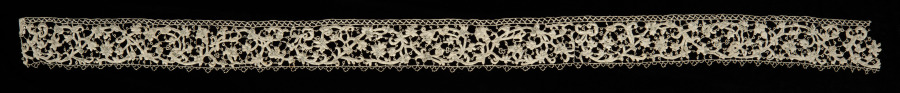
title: Lace Edging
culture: Italy, Venice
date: 1660–99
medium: Needle lace (Venetian flat point)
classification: Lace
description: This fragment of Venetian Flat Point needle lace features a free-running scroll pattern.